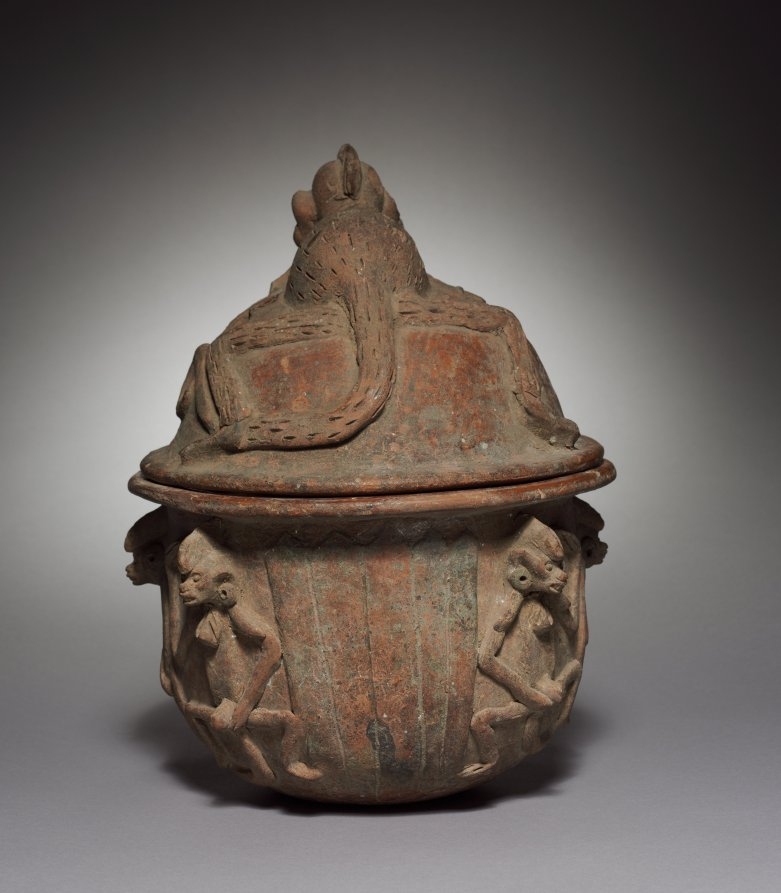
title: Incense Burner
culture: Guatemala, Quiché, San Juan Cotzal, Maya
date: 600–1000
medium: pottery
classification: Ceramic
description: According to the Popol Vuh, a sixteenth-century Quiché Maya manuscript, the world has been created and destroyed twice, and we now live in the third creation. In the second creation, human beings were made from wood and reeds. They lacked souls and minds, and they did not revere their creator. Because of these imperfections, most were killed by an uprising of utensils and domestic animals. Monkeys are the descendents of the survivors.